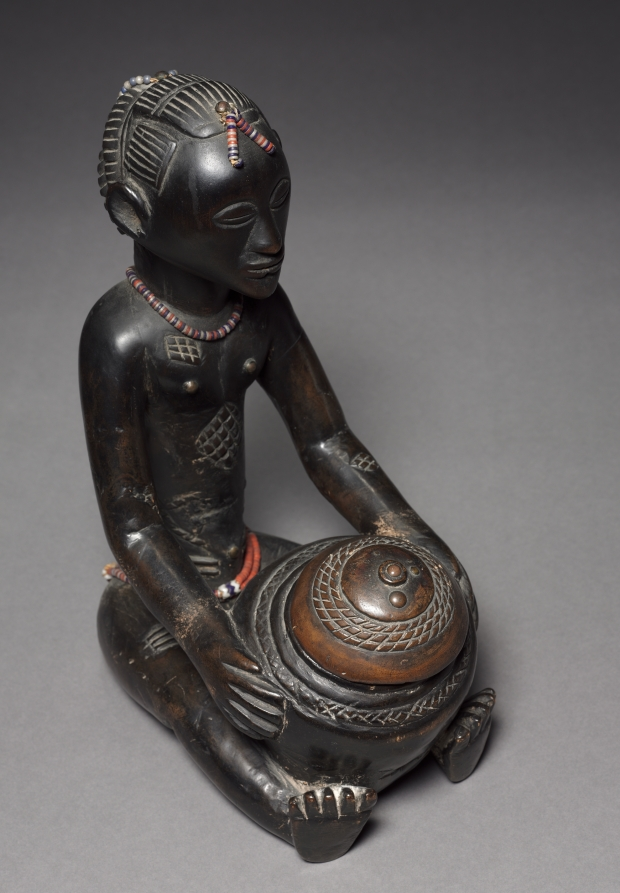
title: Female Bowl-Bearing Figure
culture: Africa, Central Africa, Democratic Republic of Congo, Luba-style carver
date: late 1800s-early 1900s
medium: Wood, glass beads, upholstery studs, plant fiber, and iron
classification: Sculpture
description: In Luba-style art, an object's beauty affects how well it works. While bowl-bearing figures had many possible uses, a royal diviner likely used this well-carved image of a woman carrying a bowl in rituals. Dusty traces of mpemba (white chalk) fleck the shining exterior and the bowl's interior, showing it once held this sacred powder. Diamond-shaped scarification marks at her waist, chest, and back add to her beauty. Her hair is carved into the cascading layered hairstyle worn in the Luba region at the turn of the twentieth century. Strands of imported glass beads encircle her waist and neck, and dangle from her hair. The alternating white and blue beads may symbolize the moon and Mbidi Kiluwe, a culture hero linked to royal practice and smithing. While much Luba-style art depicts women—who are societally important—men created and owned the majority of such works.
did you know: Symbolic of anvils, the round metal tacks decorating the figure's hair "pin" spirits and their secrets within it. They are at the hairline and each of the four hair cascades (the bottommost is now gone).